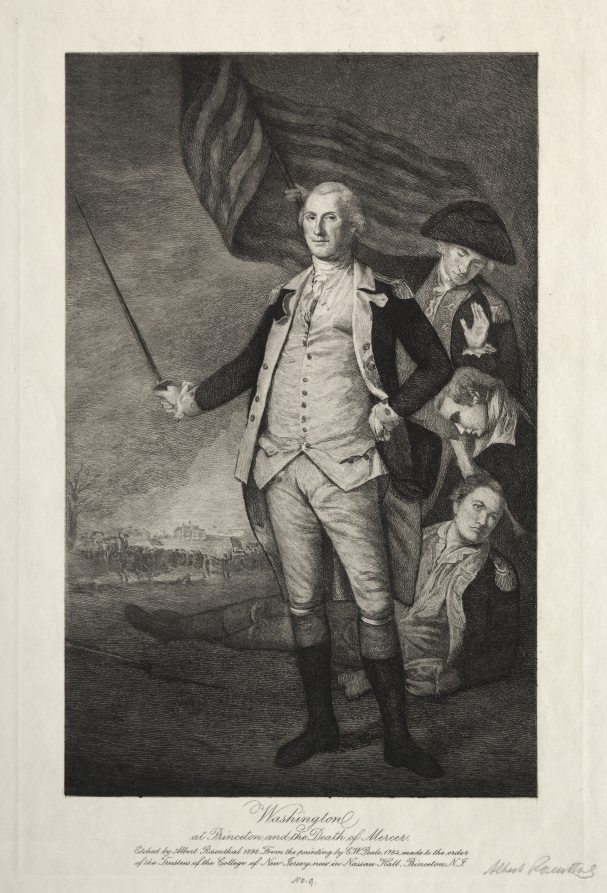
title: George Washington at Princeton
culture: America, late 19th Century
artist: Albert Rosenthal (American, 1863–1939)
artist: after Charles Willson Peale (American, 1741–1827)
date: 1898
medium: etching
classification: Print